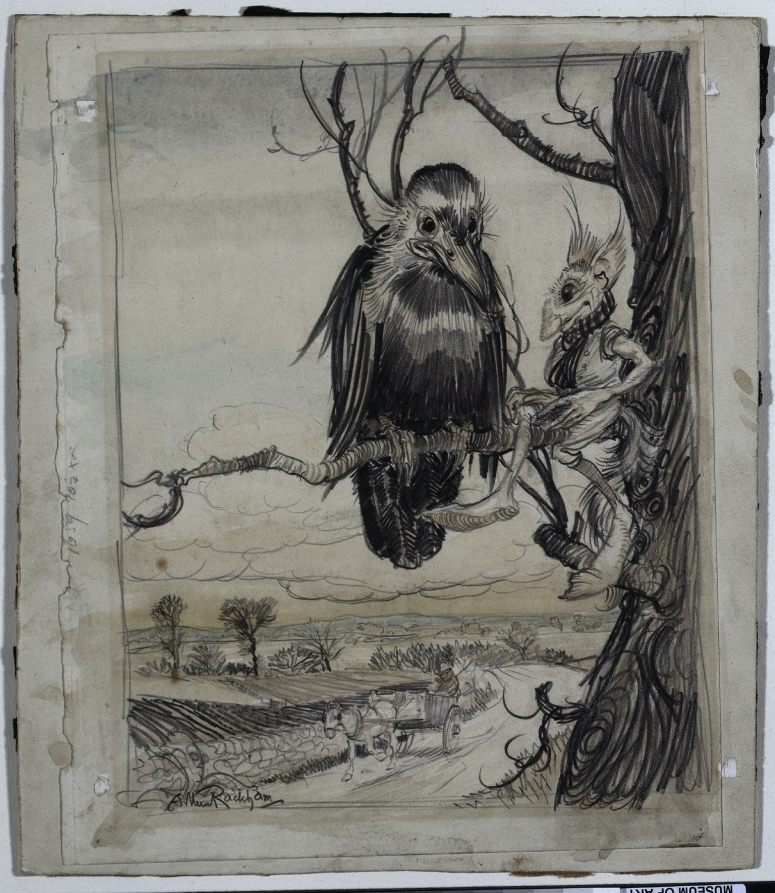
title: A Squirrel and a Crow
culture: England, 20th century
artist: Arthur Rackham (British, 1867–1939)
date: 1913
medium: ink and graphite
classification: Drawing